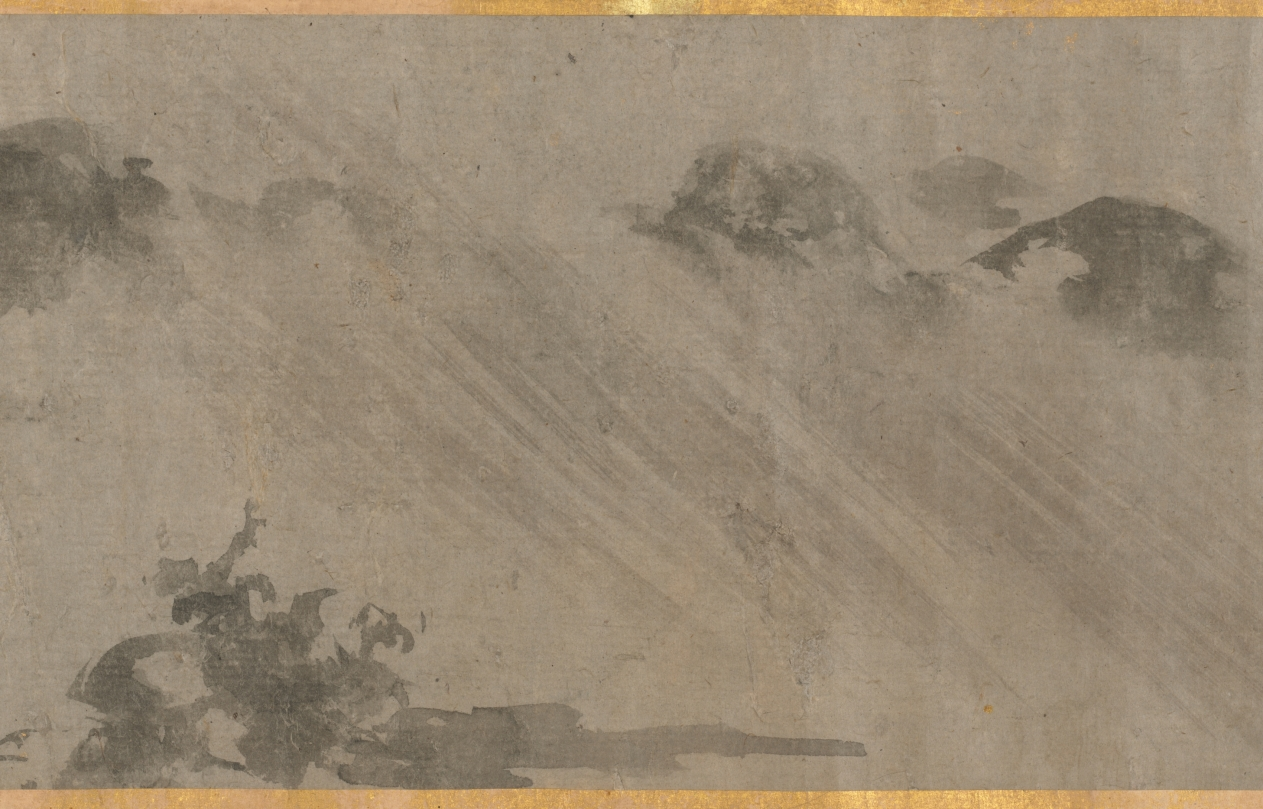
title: Eight Views of Xiao-Xiang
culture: Japan, Muromachi period (1392–1573)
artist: Sesson Shūkei (Japanese, c. 1492–c. 1577)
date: 1500s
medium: handscroll; ink on paper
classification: Painting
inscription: Signature and seal of artist at end of painting.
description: Eight Views of the Xiao and Xiang Rivers can be traced to 11th-century Chinese poems and paintings, the depiction of which had also become popular among Korean and Japanese painters. Xiao-Xiang refers to the region in present-day Hunan province where the Xiao and Xiang rivers converge. Few painters of the Eight Views had in fact seen the scenery; rather, they were trying to portray in ink and wash the lyrical qualities of dim light and a misty atmosphere typical of that region. Each of the poetic titles suggests a time of day, a season, or specific atmospheric conditions—subjects that challenged the abilities of the most talented artists. In this miniature painting (shukuzu) of the Muromachi period, Japanese Zen monk and painter Shukei Sesson depicted all eight views featured in Chinese prototypes: Wild Geese Descending to Sandbar; Returning Sails Off a Distant Coast; Mountain Market in Clearing Mist; River and Sky in Evening Snow; Autumn Moon over Dongting Lake; Night Rain on the Xiao and Xiang; Evening Bell from Mist-Shrouded Temple; and Fishing Village in Evening Glow.